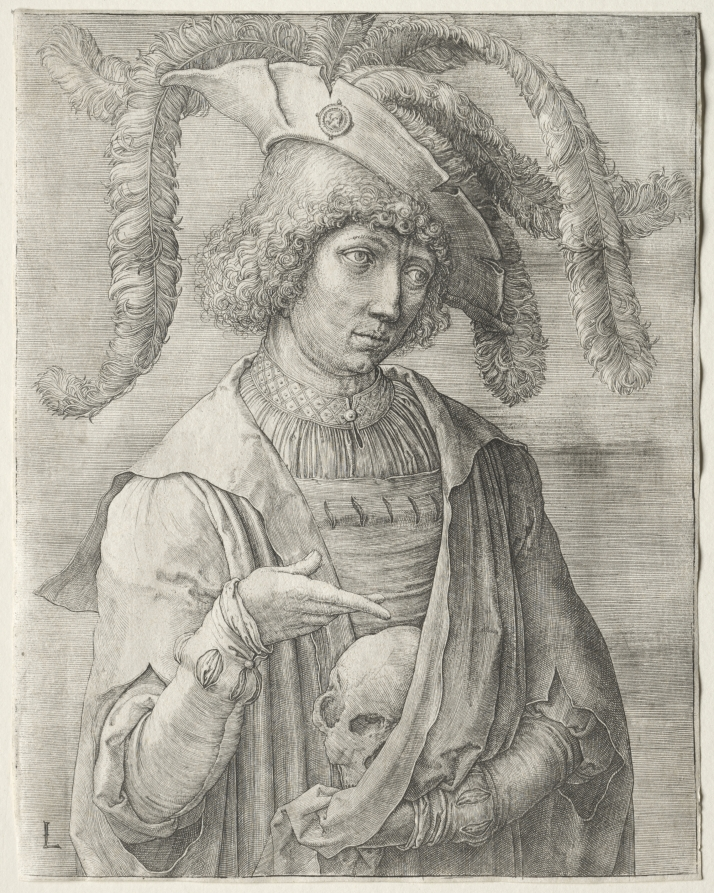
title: Portrait of a Young Man with a Skull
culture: Netherlands, 16th century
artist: Lucas van Leyden (Netherlandish, 1494–about 1533)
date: c. 1519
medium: engraving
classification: Print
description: Dressed in exceptionally fine attire––fancy plumes, brocade collar, and slashed sleeves––this young man solemnly points at a skull he is carrying in his cloak. The juxtaposition of the skull and the lavish clothing is a message that frivolous pleasures are misguided and the bravado of youth is ephemeral.